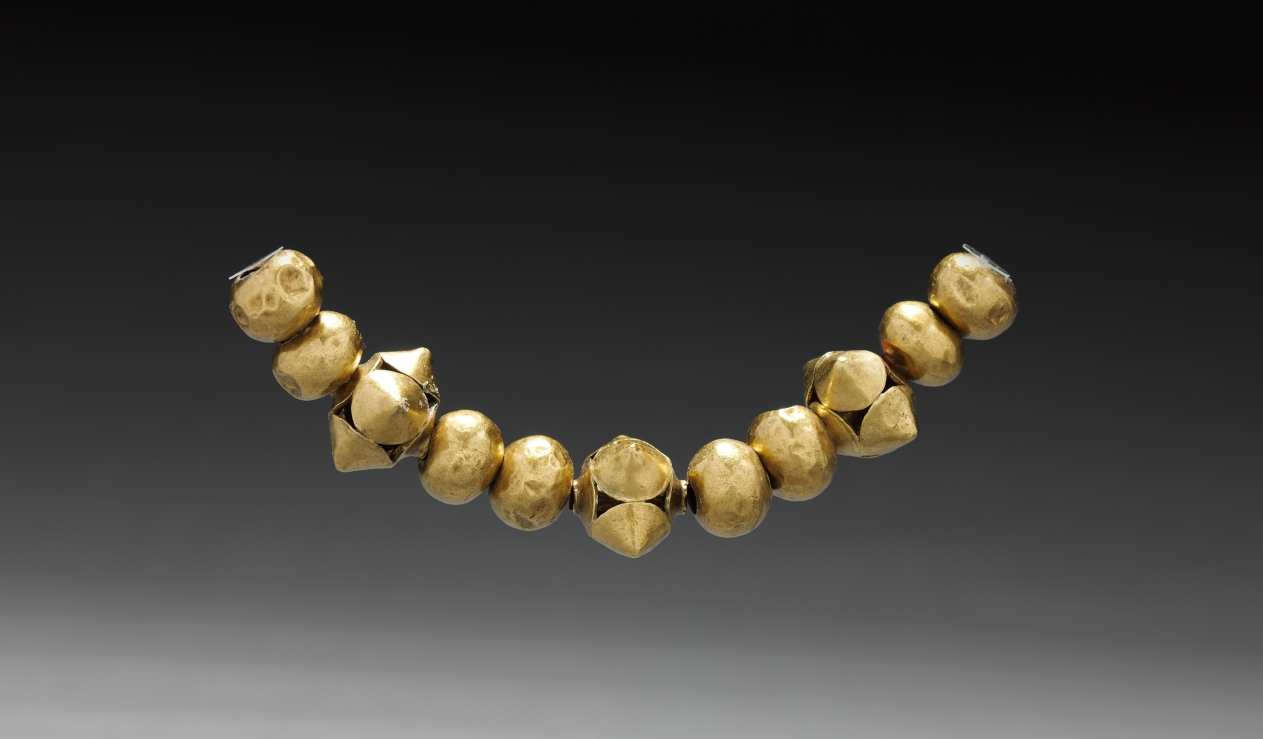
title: Beads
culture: Colombia, Muisca style(?)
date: c. 900–1550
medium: hammered gold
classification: Jewelry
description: The larger beads have pellets inside, and tinkle when shaken.